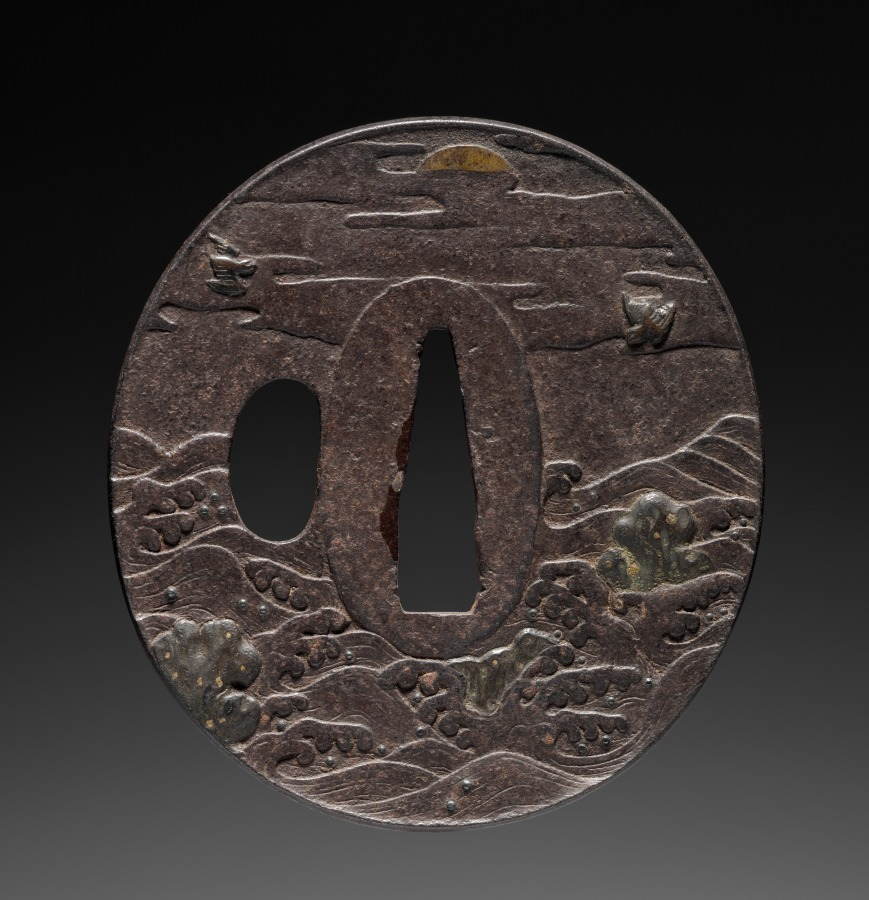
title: Sword Guard (Tsuba) with Plovers in Waves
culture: Japan, possibly Edo period (1615-1868)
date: c. 1615–1868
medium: iron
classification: Arms and Armor